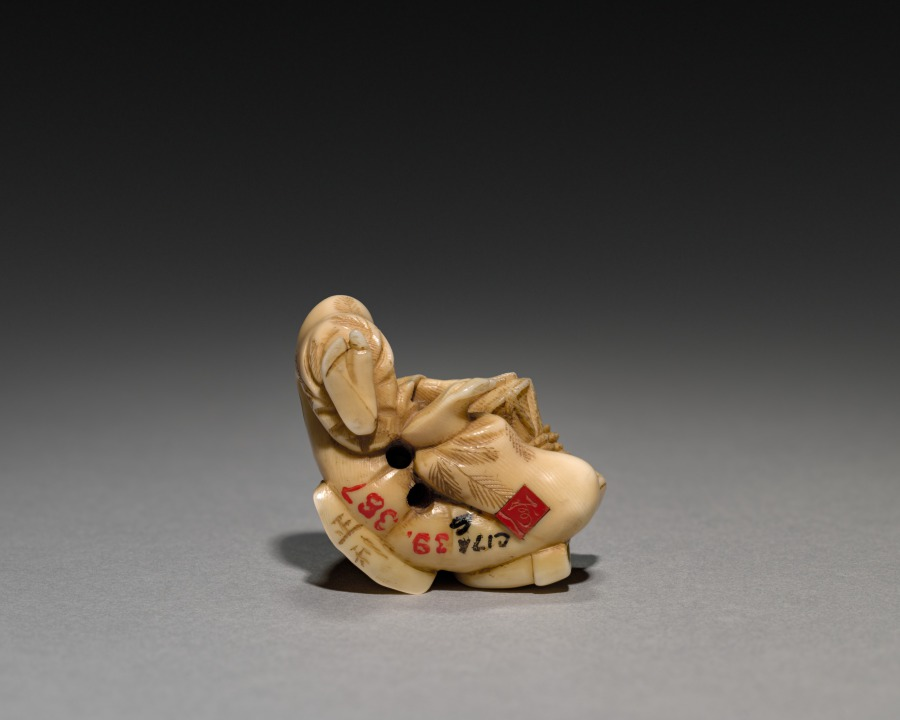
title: Man with a Drum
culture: Japan, Meiji period (1868–1912)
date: early 1900s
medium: ivory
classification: Netsuke